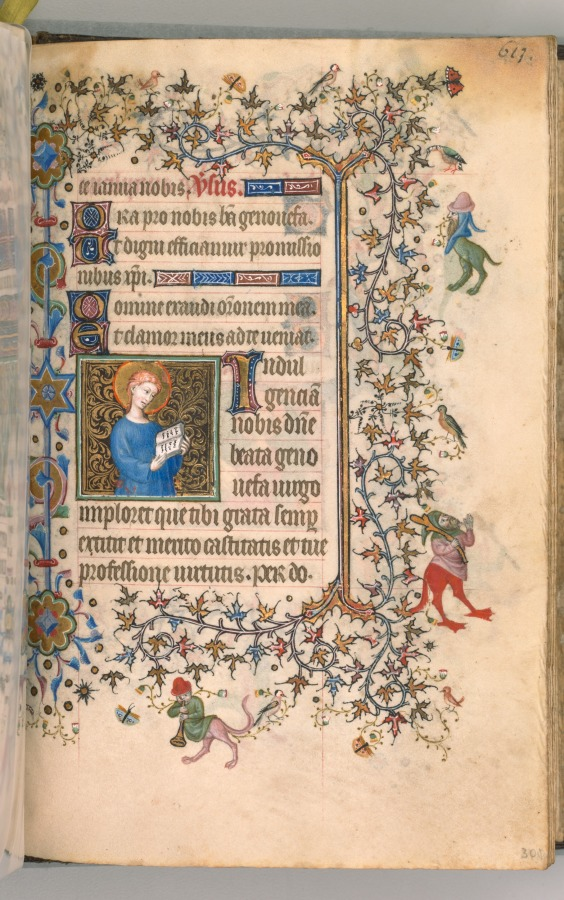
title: Hours of Charles the Noble, King of Navarre (1361-1425): fol. 301r, St. Geneviève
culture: France, Paris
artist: Master of the Brussels Initials and Associates (French)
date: c. 1405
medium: ink, tempera, and gold on vellum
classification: Bound Volume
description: This precious volume was obviously highly prized by its owner, the French-born King of Navarre, who had his coat of arms painted on no less than twenty folios. Rather than directly commissioning this manuscript from a specific workshop, it seems that Charles the Noble acquired his book of hours -- perhaps ready-made for the luxury market -- while on a trip to Paris in 1404-05. A collaborative effort, six painting styles are evidenced within the pages of this codex, those of two Italians, two Frenchmen, and two Netherlanders. The painter who was responsible for the planning and decoration of the book, and who produced seventeen of the large miniatures, was a Bolognese artist known as the Master of the Brussels Initials. His principal assistant, responsible for most of the borders, was a Florentine who signed his name "Zecho" da Firenze on folio 208 verso.